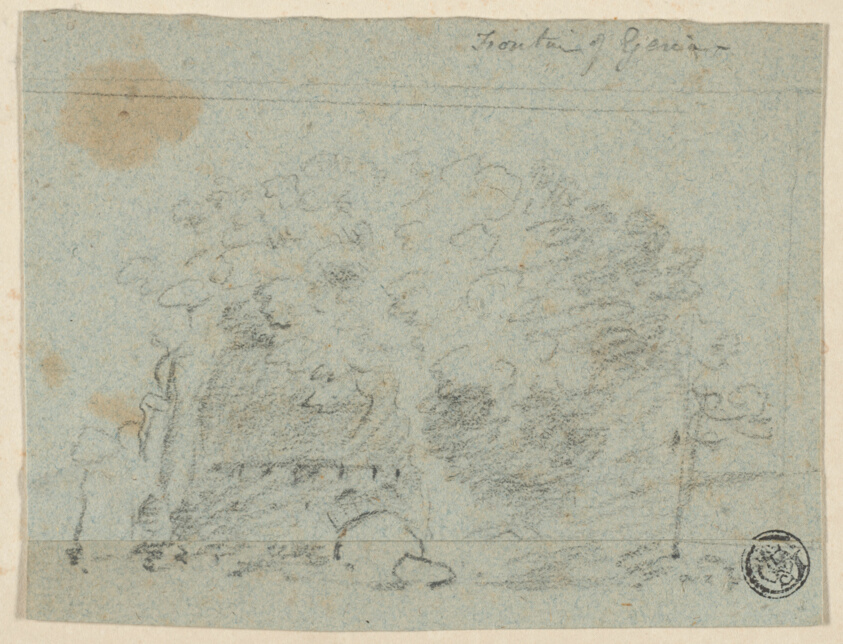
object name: Drawing and Watercolor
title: Sketch of Trees Near Bridge (recto); Sketch of Building (verso)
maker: Attributed to Richard Wilson; English, 1714-1782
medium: Charcoal and graphite (recto), and charcoal (verso), on blue laid paper, tipped onto cream wove paper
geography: England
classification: chalk; drawings (visual works); prints and drawing